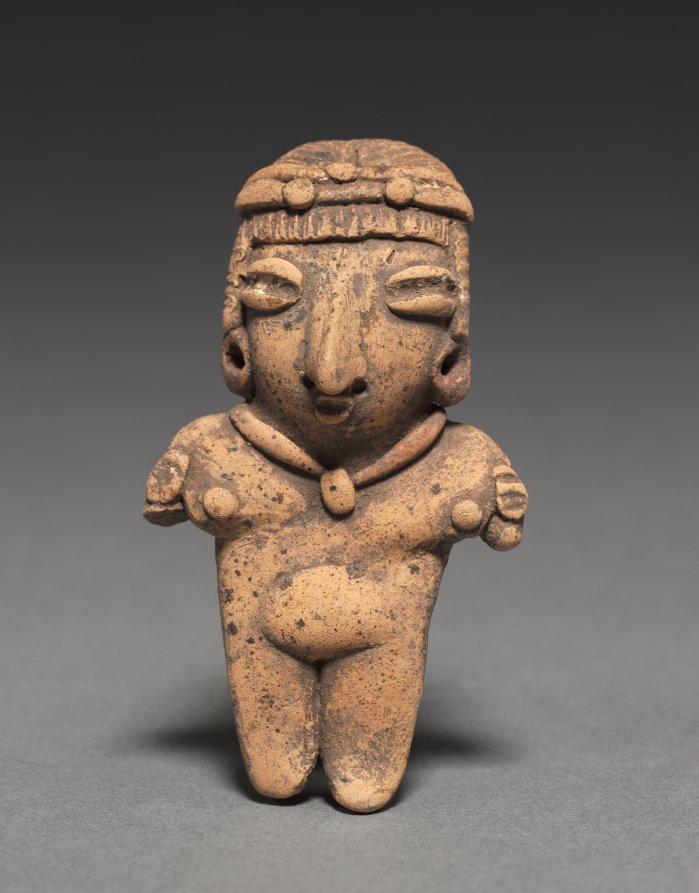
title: Female Figurine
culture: Mesoamerica, Mexico, Guanajuato, Chupícuaro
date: 400–100 BCE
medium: pottery with traces of white and red pigment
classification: Sculpture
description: The Chupícuaro culture, located north of Mexico City in the state of Guanajuato, created a distinctive ceramic tradition including small clay figurines. This example is said to belong to a group of ten figurines from the same burial or cache (1990.145–154). The group includes both males and females that can be sorted into couples based on size.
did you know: Groups of figurines were sometimes arranged in scenes and likely used in household rituals.